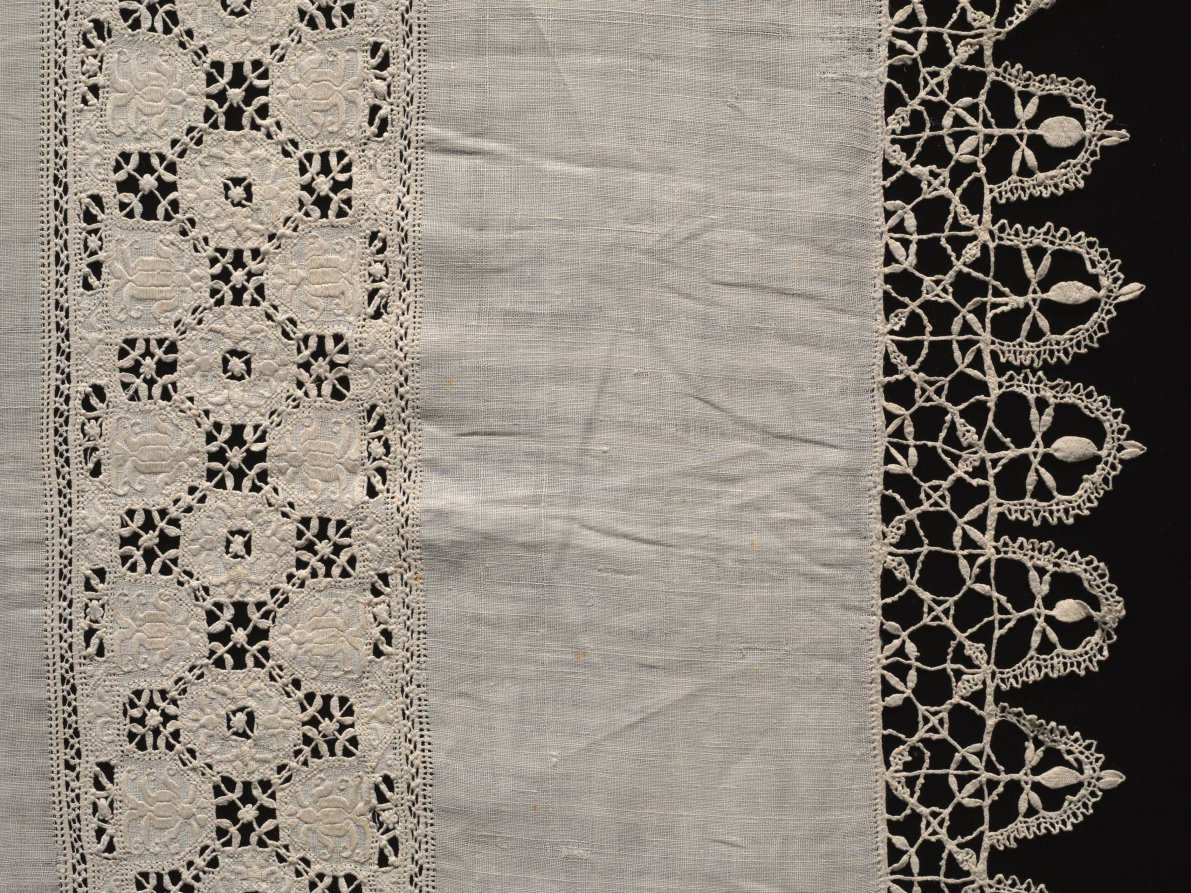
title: Lace Cloth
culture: Italy, Genoa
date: 1500s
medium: Linen: needle lace (cutwork) and bobbin lace edging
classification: Lace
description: The lace design on this cloth is based on reticella motifs.